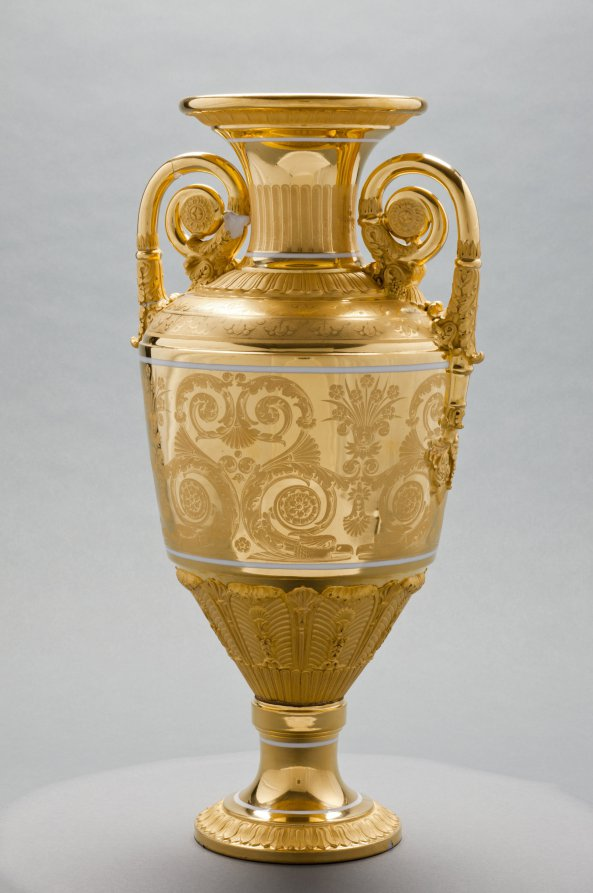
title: Vase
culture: Russia, St. Petersburg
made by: St. Petersburg Imperial Porcelain Factory (Russian)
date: c. 1820–1830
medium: gilt porcelain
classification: Ceramic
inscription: inscribed: "Moreau" in gold near lip.